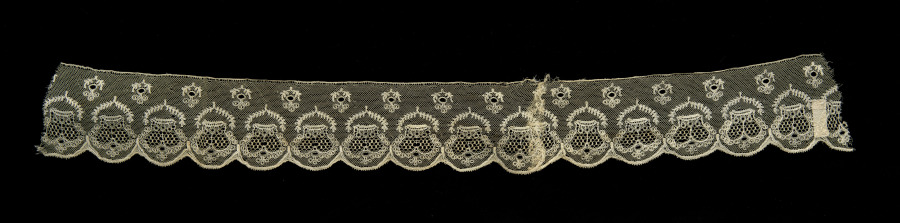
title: Lace with design known as "Crown Derby"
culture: England, Bedfordshire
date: 1800s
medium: Bobbin lace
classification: Lace